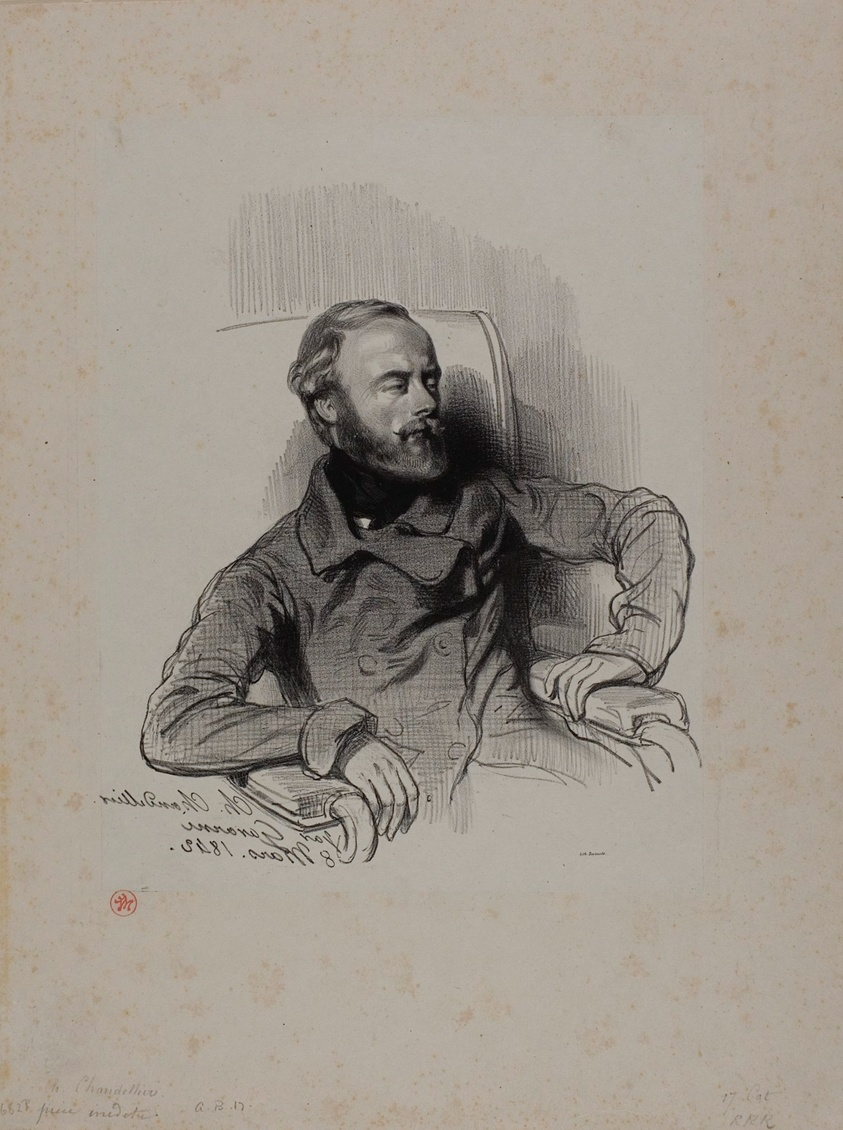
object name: Print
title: Charles Chandellier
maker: Paul Gavarni (French, 1804-1866)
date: 1842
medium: Lithograph in black on white China paper, laid down on ivory wove paper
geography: France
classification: lithograph; print; prints and drawing